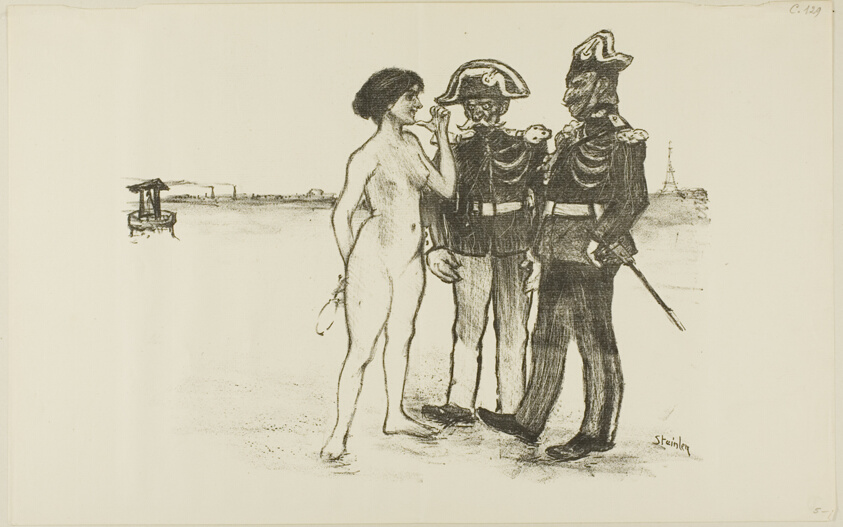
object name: Print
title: Truth and the Two Soldiers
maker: Théophile-Alexandre Steinlen; French, born Switzerland, 1859-1923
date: 1891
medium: Lithograph in black, with scraping on stone, on cream wove paper (paper appears laid but is machine-made wove)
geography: France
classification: lithograph; print; prints and drawing